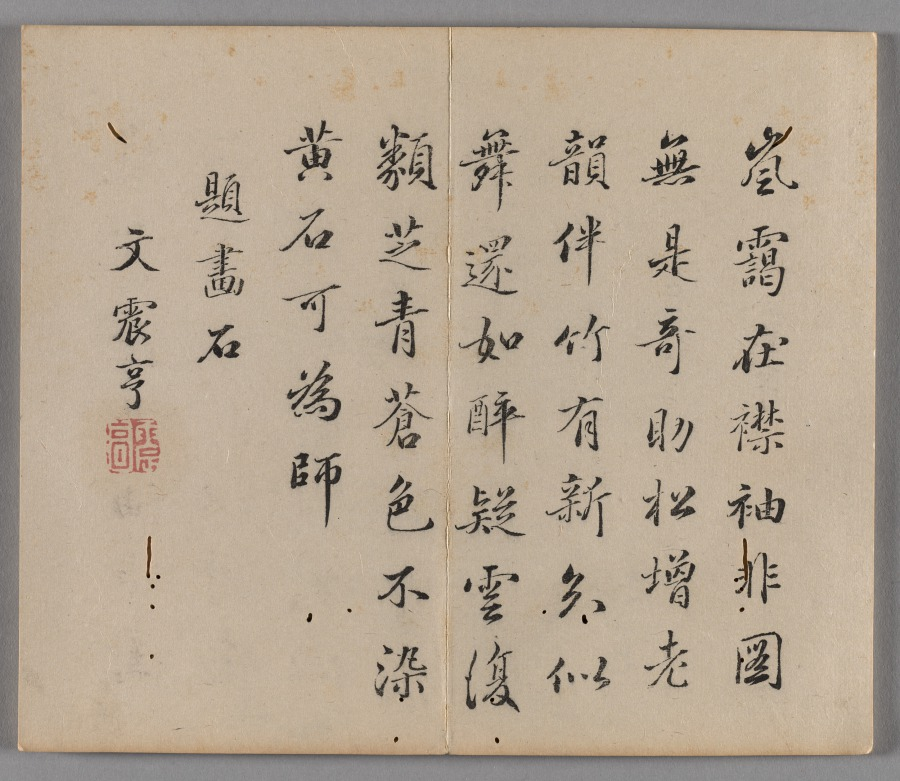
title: Ten Bamboo Studio Painting and Calligraphy Handbook (Shizhuzhai shuhua pu): Rocks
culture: China, Qing dynasty (1644-1911)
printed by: Hu Zhengyan (Chinese, c. 1584–1674)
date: 1633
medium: Woodblock-printed book; ink and colors on paper; first edition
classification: Print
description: Color printing reached a level of perfection in the early 1600s, as seen in this Ten Bamboo Studio Collection of Calligraphy and Painting and the Mustard Seed Garden Manual of Painting (printed 1679 and 1701). The painterly quality, precision in registering (aligning) the woodblocks, and harmonious colors made them the most successful color print editions in Chinese history. Both editions were printed and compiled in Nanjing, spread nationwide, and had a great impact on the arts in Japan and Korea.